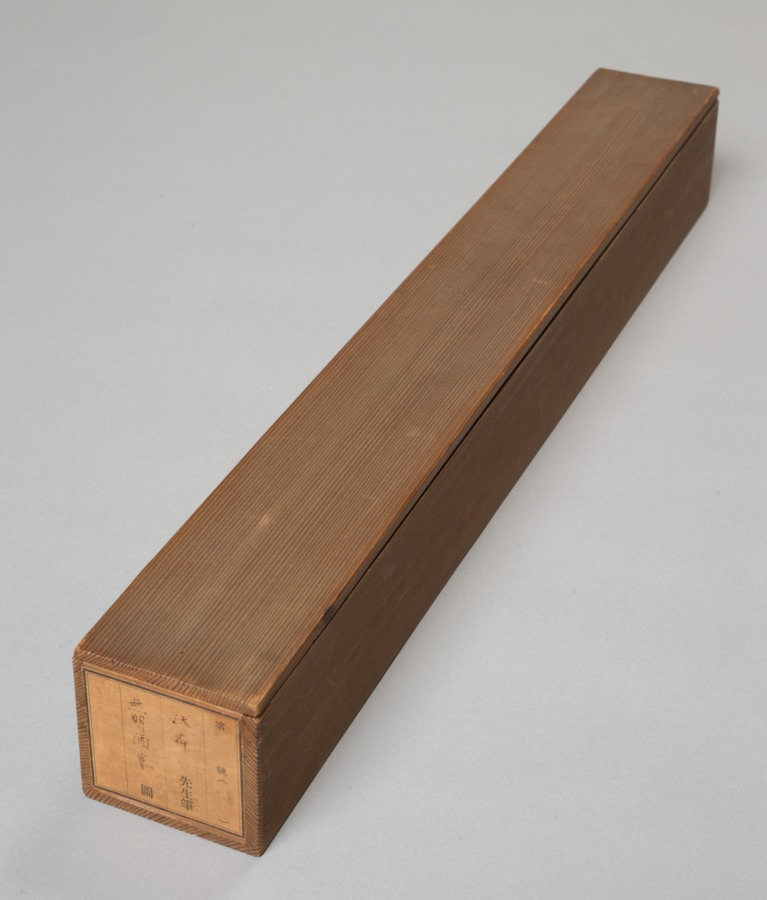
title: Sake Party with No Light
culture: Japan, Meiji period (1868–1912) to Taishō period (1912–26)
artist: Tomioka Tessai (Japanese, 1836–1924)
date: late 1800s–early 1900s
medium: hanging scroll; ink on paper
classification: Painting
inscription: Artist's signature and seal at left side; title at top left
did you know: Three skeletons are holding cups and passing around a bottle of sake.